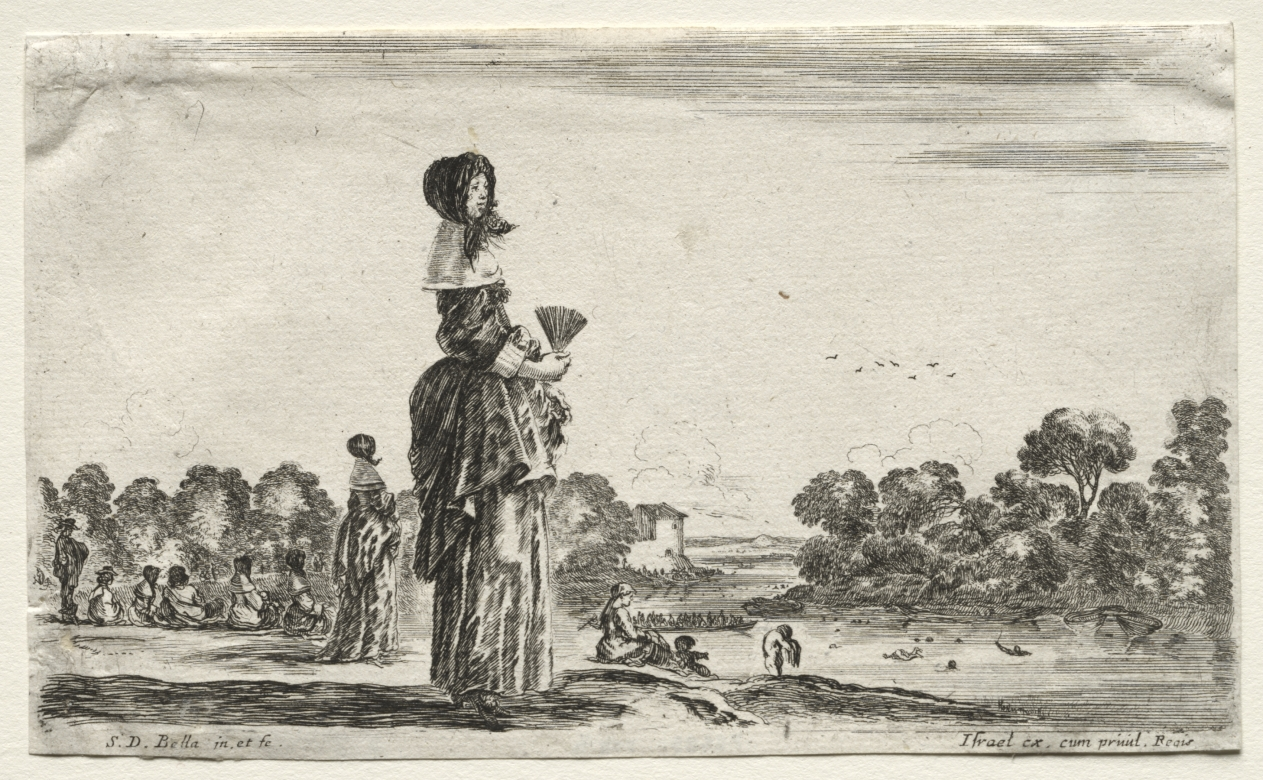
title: Various Figures and Landscapes: Women Watching Bathers along a River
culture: Italy, 17th century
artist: Stefano Della Bella (Italian, 1610–1664)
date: 1649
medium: etching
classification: Print